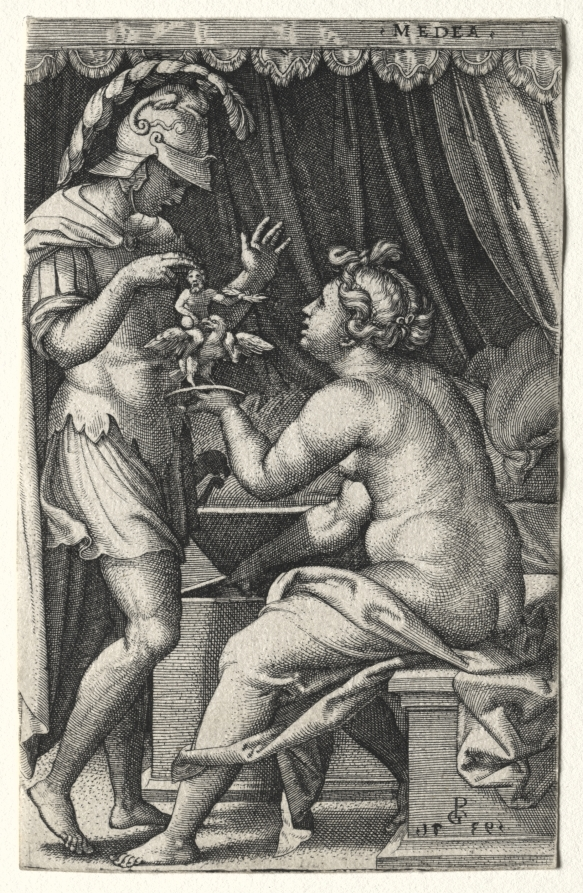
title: Medea and Jason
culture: Germany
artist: Georg Pencz (German, c. 1500–1550)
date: 1539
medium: engraving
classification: Print